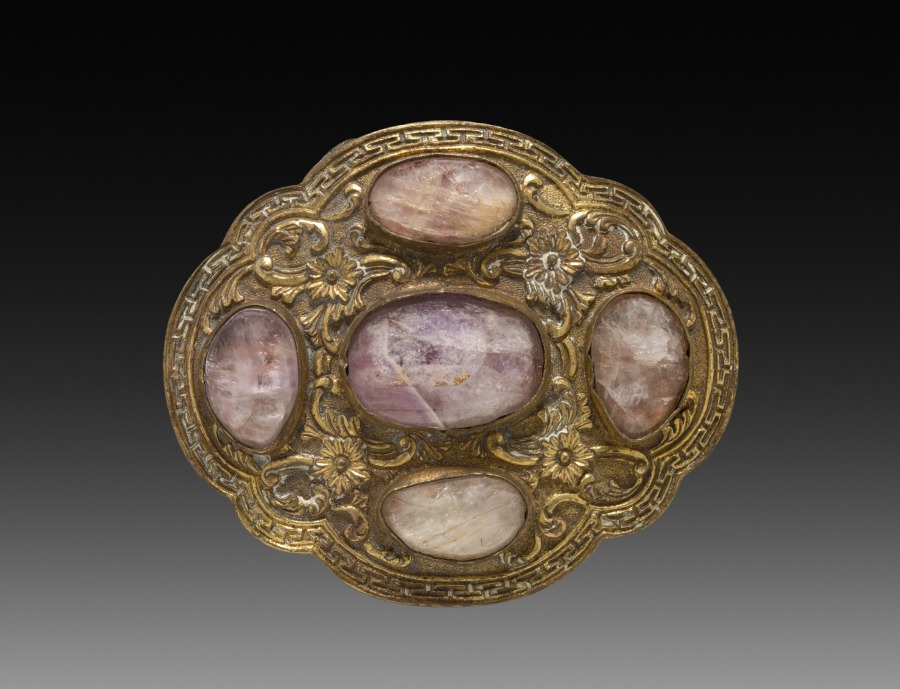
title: Buckle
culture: China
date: 1900s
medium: gilt brass, engraved and set with rose quartz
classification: Jewelry